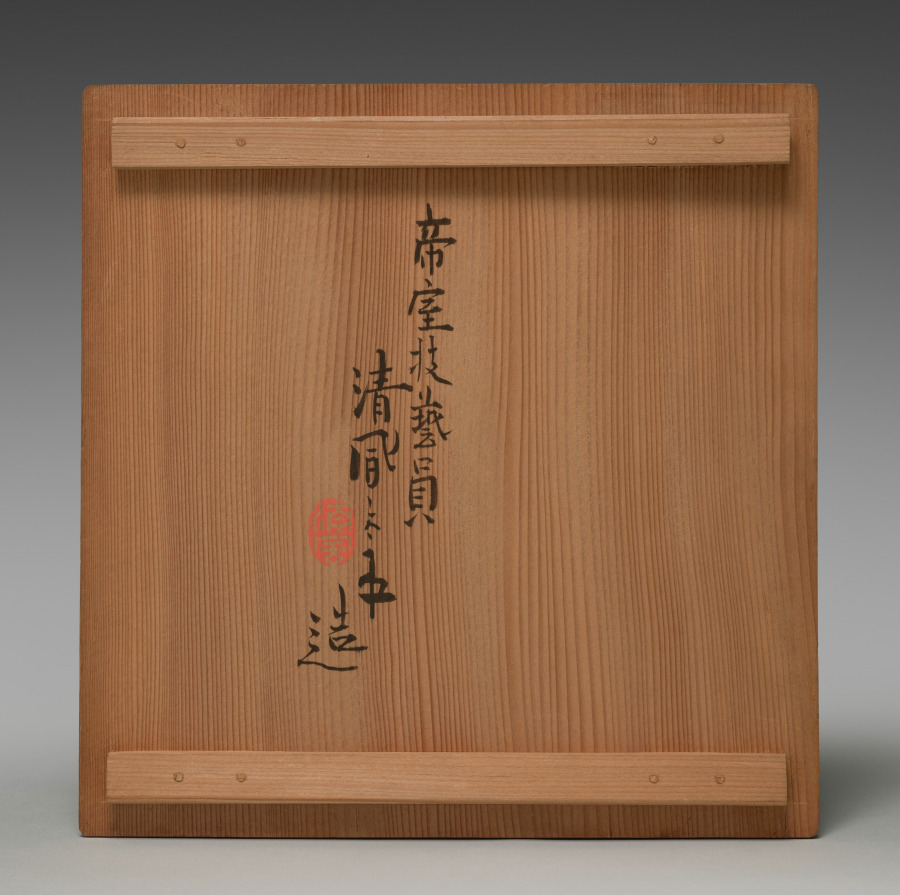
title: Bowl with Numinous Fungi and Kirin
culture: Japan, Meiji period (1868–1912)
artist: Seifū Yohei III (Japanese, 1851–1914)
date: 1893–1900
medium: Porcelain with cobalt blue glaze, overglaze color enamel, and silver painting overlay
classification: Ceramic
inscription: 清風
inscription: 清風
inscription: 帝室技芸員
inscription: 清風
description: The complex design of this bowl is also technically sophisticated in its execution. On the interior, Yohei III has placed a mythical beast called a kirin (Chinese, qilin) within a double-banded circle painted in cobalt blue under the glaze. Around the interior of the mouth, bordered at top and bottom with underglaze blue under a brown iron oxide painted rim, he has painted a continuous coin pattern with a red wash and green color enamels. The pattern is further defined and embellished with black iron outlining the green- and gold-painted diamonds over the diluted red. The inside is otherwise left white. On the exterior, the body has a dark blue glaze and an overlaid silver design of reishi with incised lines for detail.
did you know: Inside the bowl is an auspicious, mythical deerlike creature called kirin in Japanese (麒麟 or qilin in Chinese).